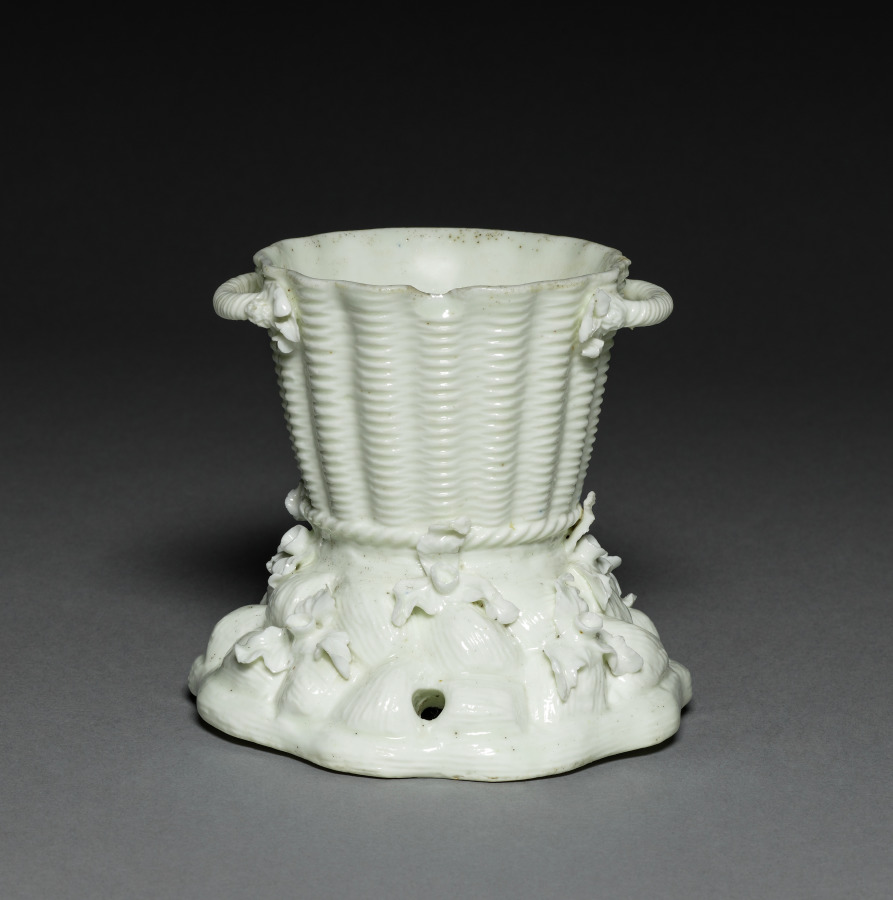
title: Potpourri Vase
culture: France, Saint Cloud, 18th century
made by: Saint Cloud Porcelain Factory (French)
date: mid-1700s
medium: soft-paste porcelain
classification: Ceramic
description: A vase like this was created to contain potpourri, a mixture of flowers, herbs, and spices emitting ambient fragrance. This specific function offered a particularly fertile ground for the development of French porcelain, as manufactories experimented with forms, surface ornamentations, and placement of perforations.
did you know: Prior to Saint-Cloud's development of soft-paste porcelain in the 1690s, rumors spread throughout Europe that the prized material was made by burying a variety of materials, including lobster shells, in the ground for eighty years.